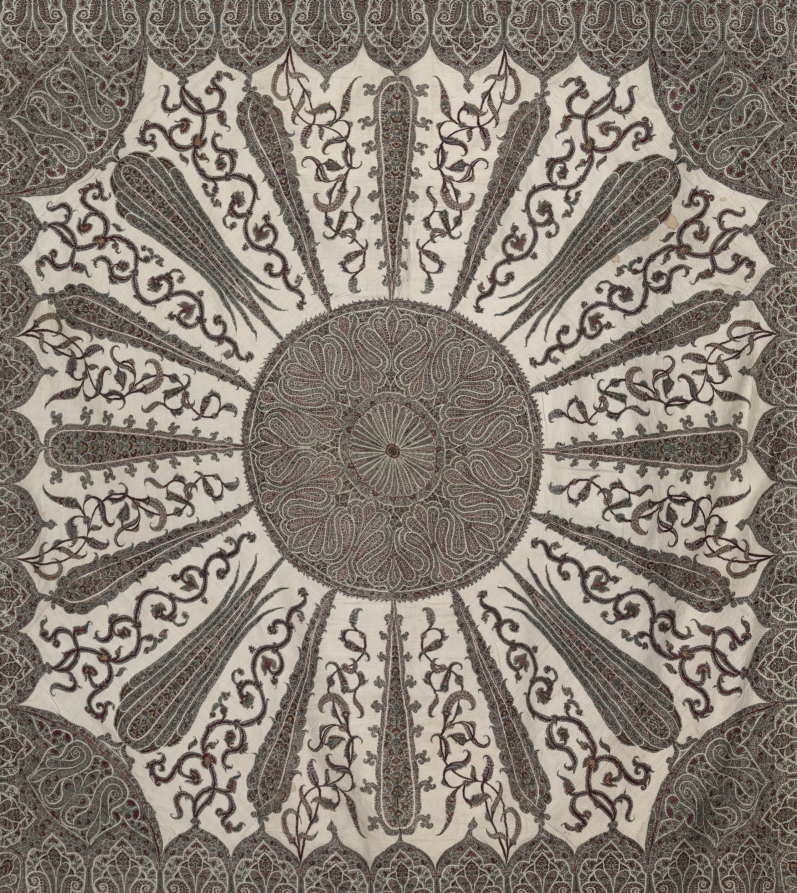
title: Square Shawl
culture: India, Kashmir, late 19th century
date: 1880s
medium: twill tapestry and embroidery; large pieced areas: wool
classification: Textile